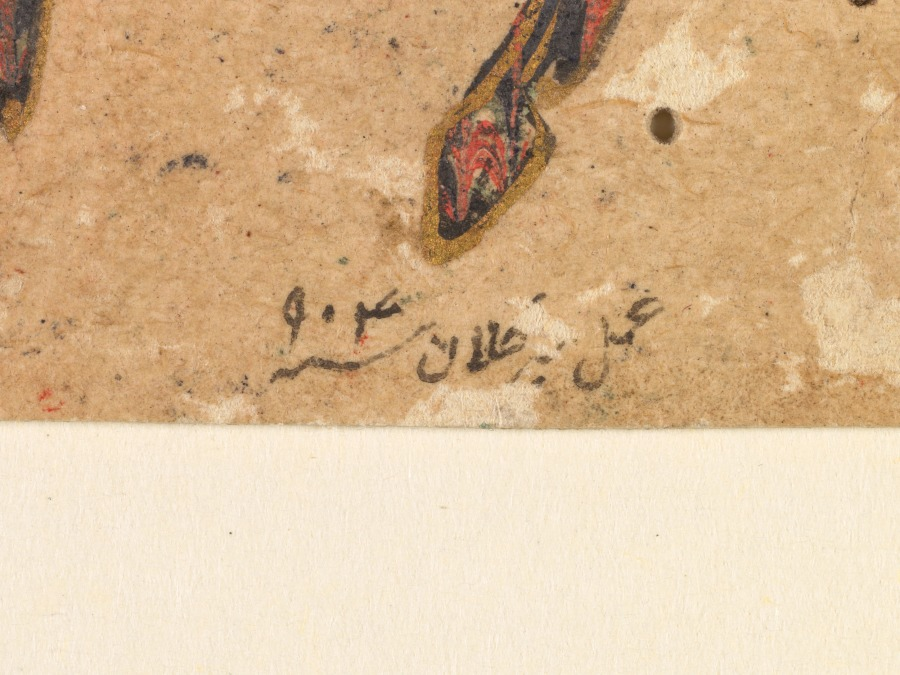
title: A marbled picture of Rustam catching Rakhsh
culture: India, Bijapur, Deccan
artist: attributed to Shafi (Indian, active about 1650)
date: c. 1650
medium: Gum tempera and gold on paper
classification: Painting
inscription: apocryphal inscription lower left: 'amal-i mir Kalan 904 verso: inscription identifying the scene of Rustam capturing Rakhsh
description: This scene depicts the young hero Rustam catching a foal, Rakhsh (meaning “light”), who will be his faithful companion through many adventures. A prophet-like shepherd figure with a staff at the upper left predicts that Rustam will be the savior of Iran. At the top of the page a feline has caught its prey, while a hunter steps on its tail. This extraordinary painting has more applications of marbled colorant than any other known example. Even all the flowers and birds have been articulated through marbling in a feat of registration and control by a master of the technique.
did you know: Even the flowers and insects used as filler in this composition were marbled.